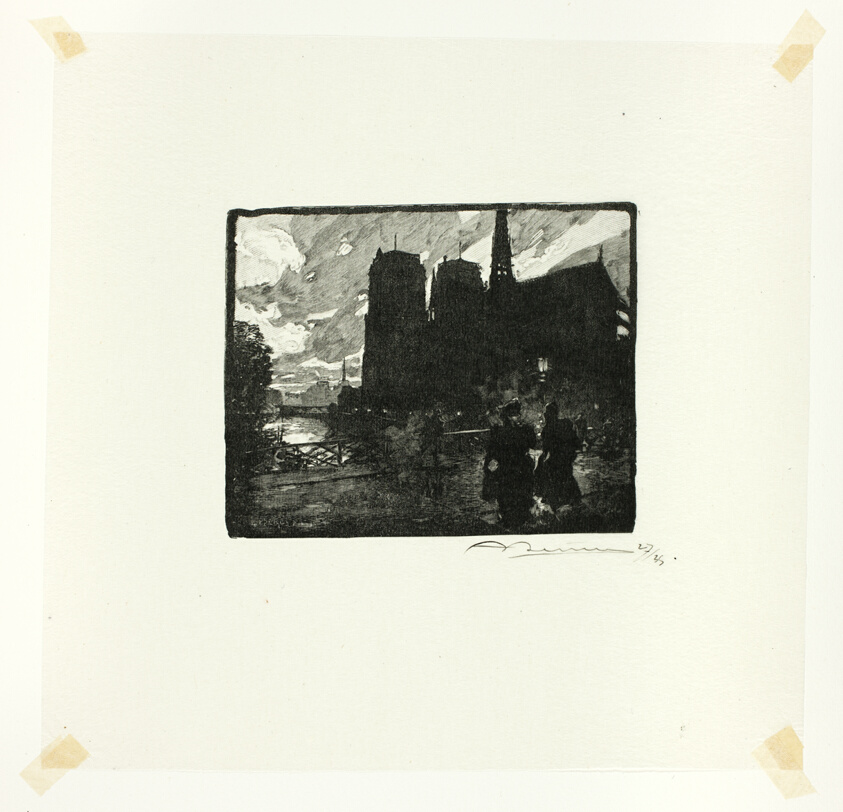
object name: Print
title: Notre-Dame, Evening, plate eight from Le Long de la Seine et des Boulevards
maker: Louis Auguste Lepère (French, 1849-1918); published by A. Desmoulins (French, active c. 1908-1910)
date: 1890, published 1910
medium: Wood engraving in black on cream Japanese tissue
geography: France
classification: wood engraving; paper; print; prints and drawing